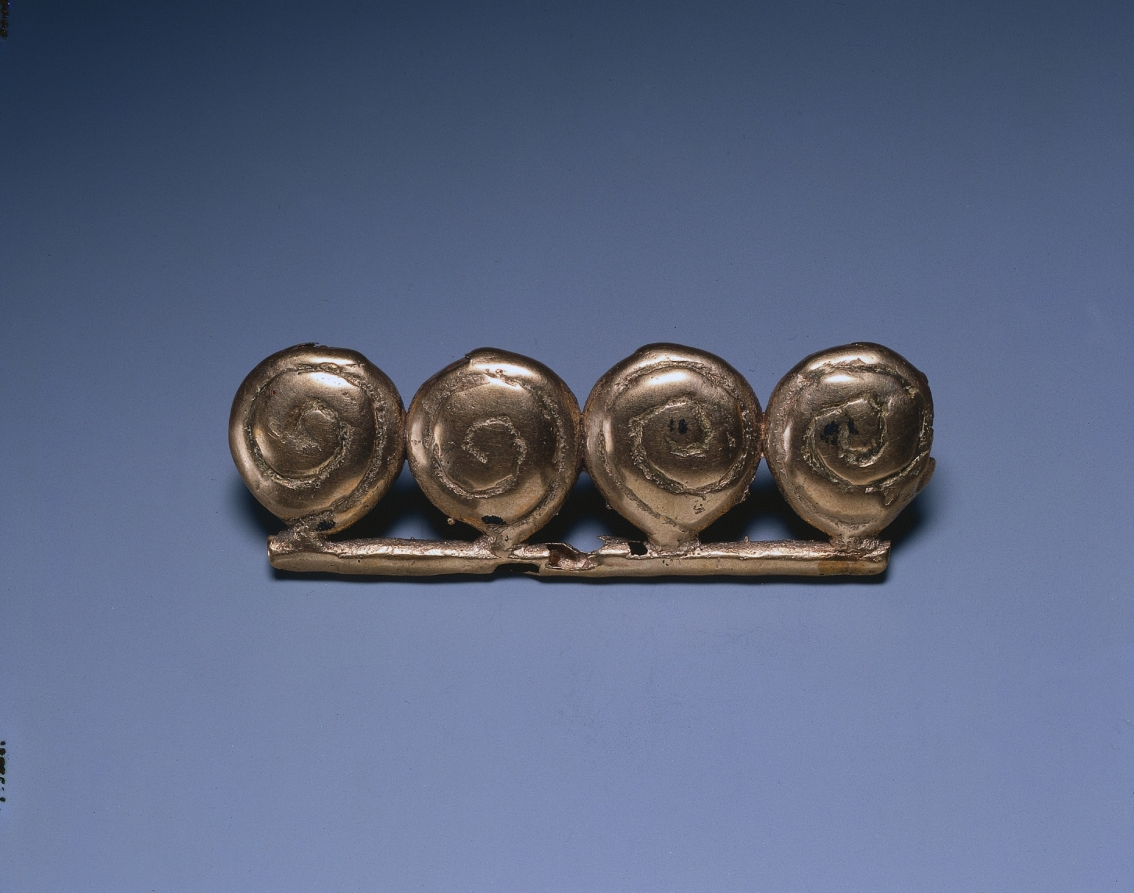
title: Linked Shells Pendant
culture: Colombia, Muisca style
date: c. 900–1550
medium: cast gold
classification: Metalwork